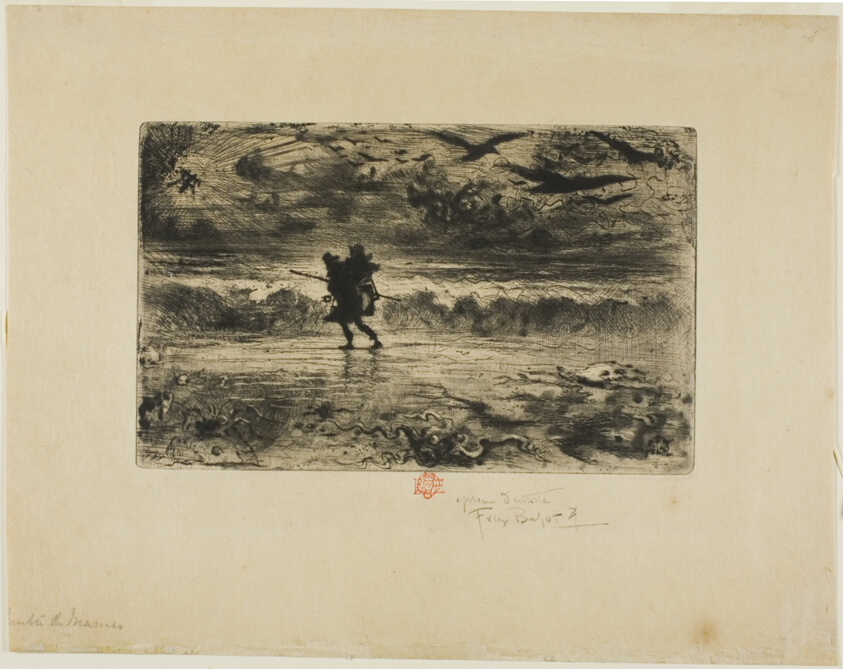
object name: Print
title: The Painter of Seascapes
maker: Félix Hilaire Buhot (French, 1847-1898)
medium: Drypoint and aquatint on buff Japanese paper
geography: France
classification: drypoint; print; prints and drawing